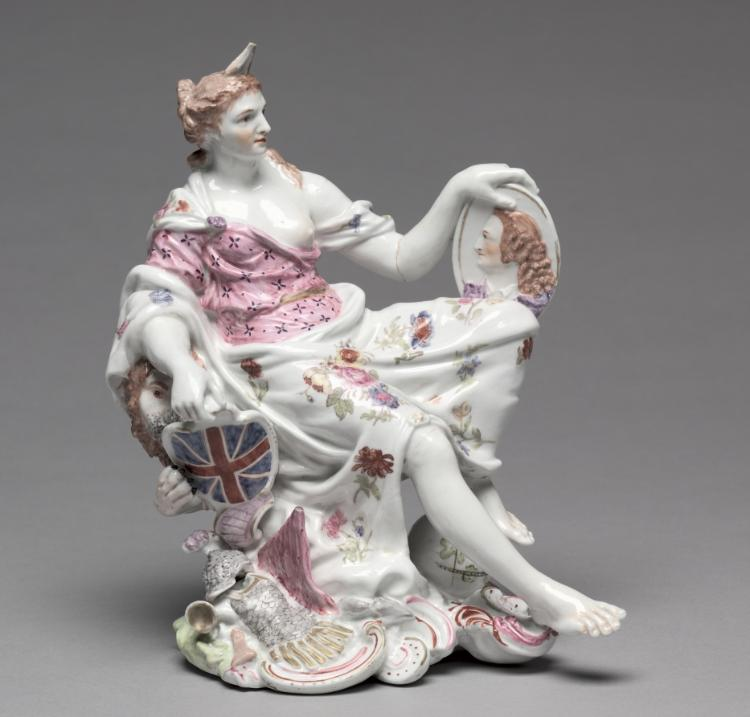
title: Figure of Britannia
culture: England, Staffordshire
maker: Longton Hall Porcelain Factory (British, Staffordshire, 1749–60)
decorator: Vauxhall Porcelain Factory (British, 1751–1764)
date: c. 1756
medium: soft-paste porcelain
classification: Ceramic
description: In this depiction of Britannia, the figure is surrounded by symbols of England’s power and military might. On one side, she and a lion, another symbol of Britain, support a shield adorned with the Union flag. Below it lay motifs associated with war such as armor, a trumpet, and a flag. On her left, Britannia presents a medallion to the viewer as she rests her feet on a globe, a symbol of the nation’s territorial aspirations. The portrait may depict the reigning king, George II (1683–1760), or Prince Frederick Louis (1707–1751), his recently deceased heir.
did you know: The creation of this triumphant personification of the nation was likely spurred on by Great Britain’s conflict with France in the Seven Years’ War (1756–63).